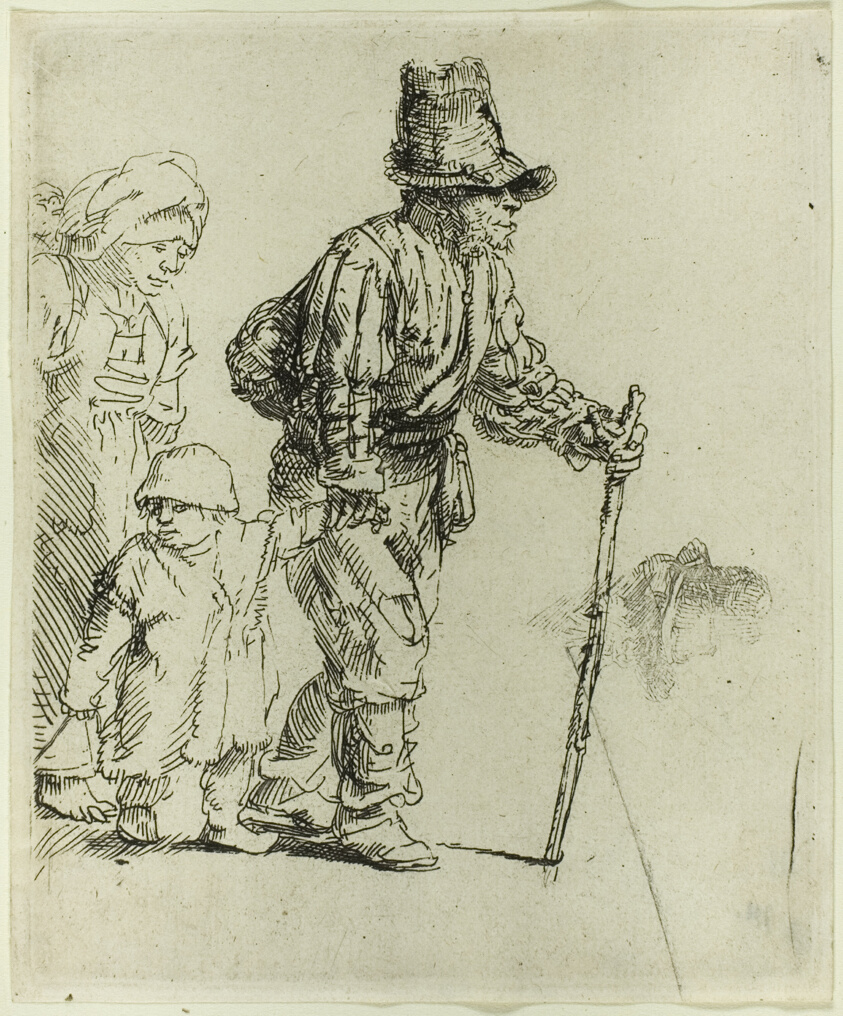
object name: Print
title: Peasant Family on the Tramp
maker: Rembrandt van Rijn (Dutch, 1606-1669)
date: c. 1652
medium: Etching on cream laid paper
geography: Holland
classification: etching; print; prints and drawing; paper